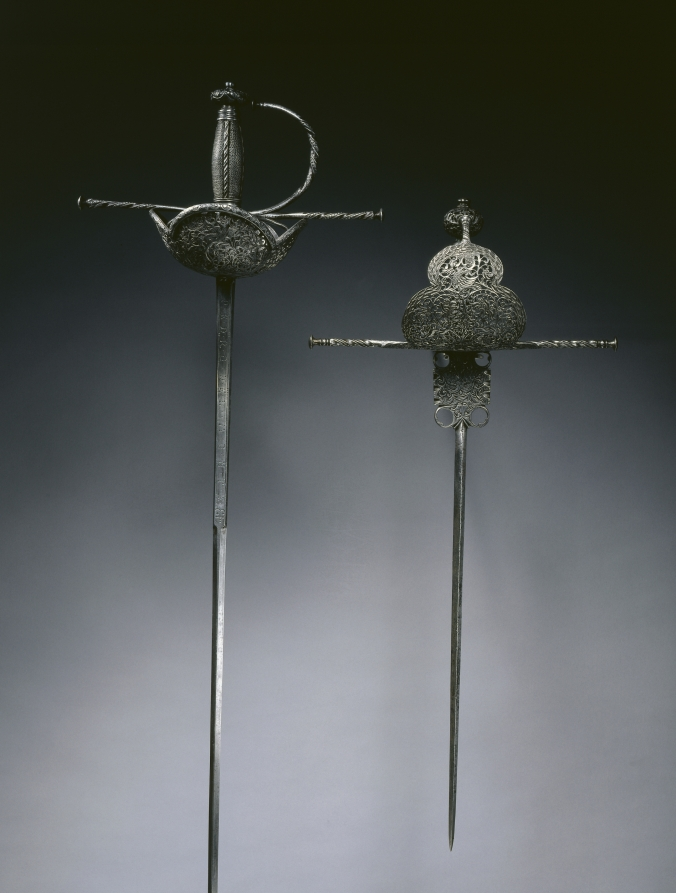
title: Cup-Hilted Rapier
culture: Spain, Toledo, 17th century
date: c. 1650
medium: Pierced and chiseled steel;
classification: Arms and Armor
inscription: PEDRO DEL MONTE/ IN TOLEDO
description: For parrying, rapiers were often made with accompanying daggers as a matched set. The aristocracy's taste for rich and intricate styles of decoration led to extravagant gilding, chiseling, piercing, enameling, and silvering. The more costly or unusual these weapons appeared, the more they were desired by the clientele who commissioned them, not only for dueling but also as the ultimate accessory.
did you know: The guard is richly decorated with chiseled and pierced arabesques, an ornamental design consisting of intertwined flowing lines.